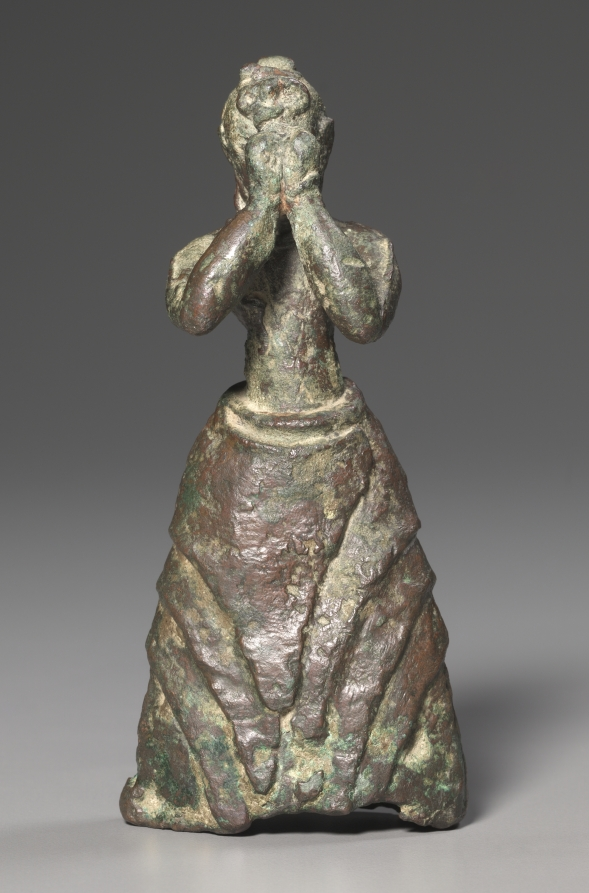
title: Female Worshiper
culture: Crete, Minoan, middle Minoan III–late Minoan I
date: c. 1600–1500 BCE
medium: bronze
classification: Sculpture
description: This extremely rare Minoan bronze statuette represents a girl worshiping a deity. It was probably left as a dedication to a divinity. She wears a flounced skirt over a sleeved robe open at the front. The figure shows a remarkable degree of detail, including looped earrings, bracelets, and a necklace. Her shaved hairstyle, not found on any other Minoan bronze statuette, matches that of painted figures in roughly contemporary frescoes uncovered on the island of Thera, north of Crete. Its excellent condition, rarity, fine detail, and balanced proportions set it apart from other statuettes of its type to have survived.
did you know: The shaved head with prominent locks of hair indicates that this female votive figure is an adolescent.